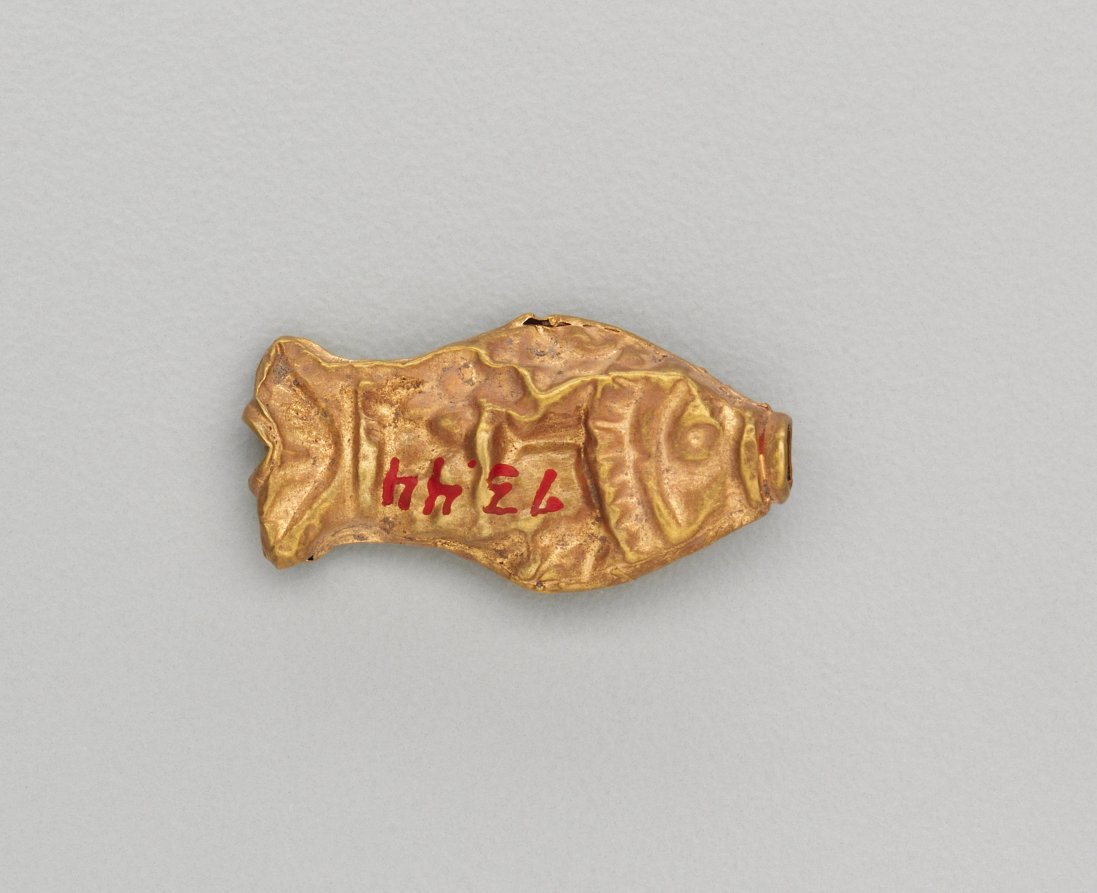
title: Necklace Bead in the Form of a Fish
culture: India, Shunga period (185–78 BCE)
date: 185–72 BCE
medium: gold repoussé with granulation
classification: Jewelry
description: Jewelry in ancient India often consisted of elements associated with water, such as fish and other aquatic plants and animals. Since water is essential for life, imagery that connotes water is life-affirming, or auspicious, and therefore appropriate adornment.